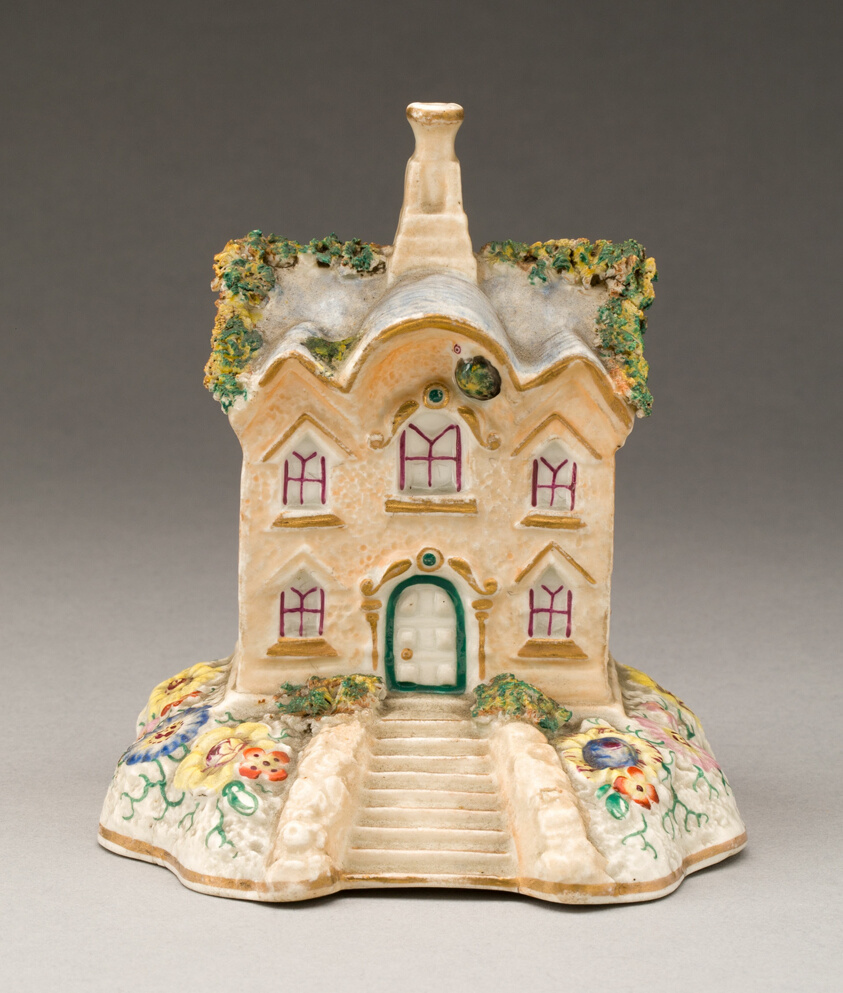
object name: Ceramics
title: Incense Burner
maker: England, Staffordshire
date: c. 1830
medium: Glazed earthenware with polychrome enamel decoration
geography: Staffordshire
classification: ceramics; european decorative arts